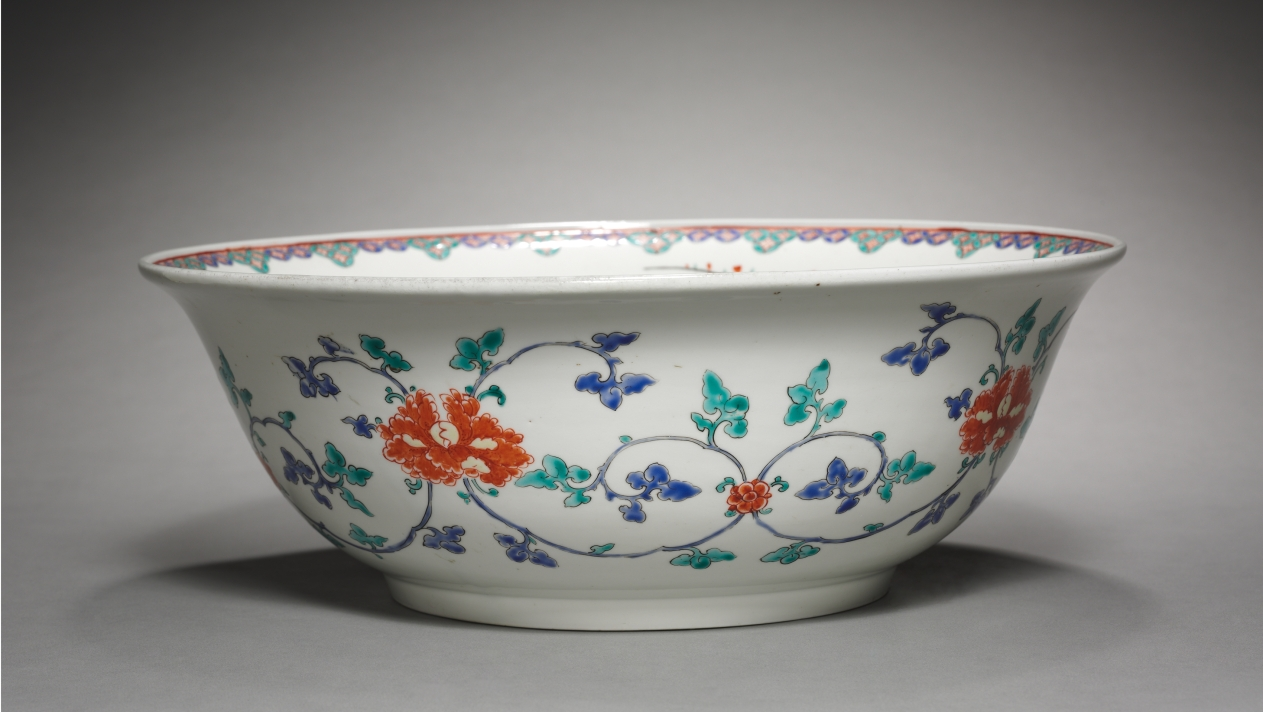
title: Bowl: Kakiemon Ware (2 of 2)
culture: Japan, Edo period (1615–1868)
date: late 1600s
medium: porcelain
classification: Ceramic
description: The Chinese style of decoration identifies this bowl as a product made for the markets in England, Holland, France, and Germany. Here, kakiemon potters rearranged the Chinese literati motifs of the plum, pine, and bamboo. Such kakiemon ware inspired domestic porcelain production in Europe in the 18th and 19th centuries.